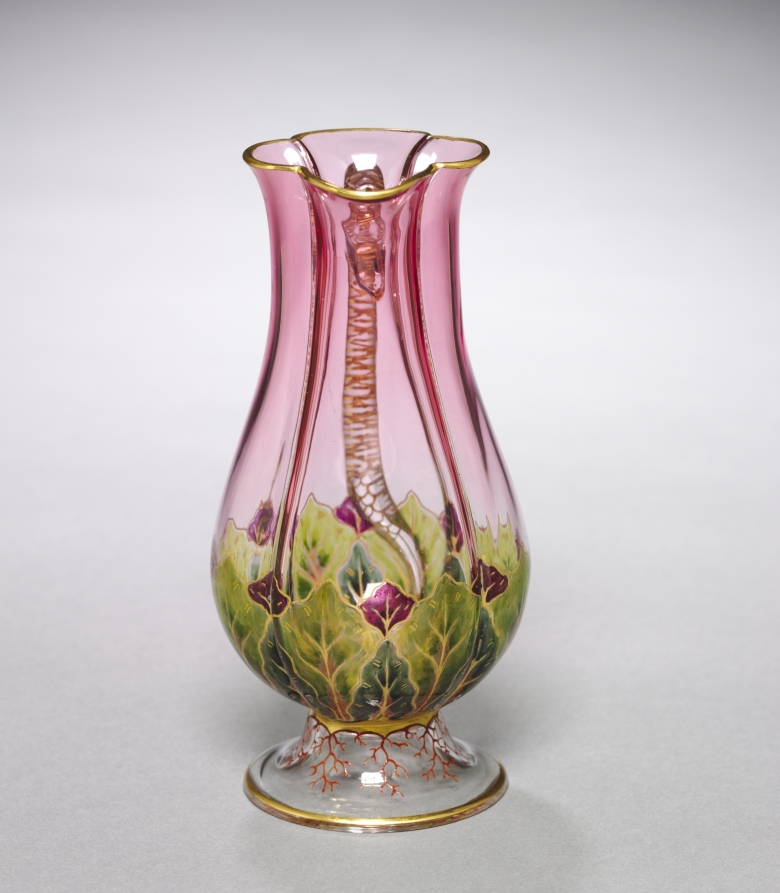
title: Pitcher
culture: Austria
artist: J. & L. Lobmeyr (Austrian, Vienna, est. 1823)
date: 1800s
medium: enameled and gilded glass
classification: Glass